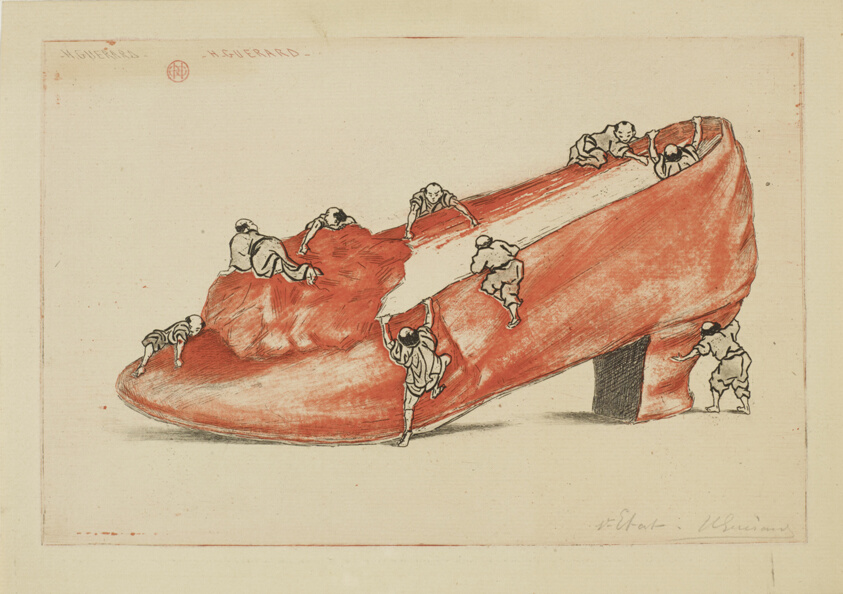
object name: Print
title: The Assault of the Shoe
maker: Henri Charles Guérard (French, 1846-1897)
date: 1888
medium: Etching, with open bite, in light red and black on cream laid paper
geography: France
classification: etching; paper; print; prints and drawing